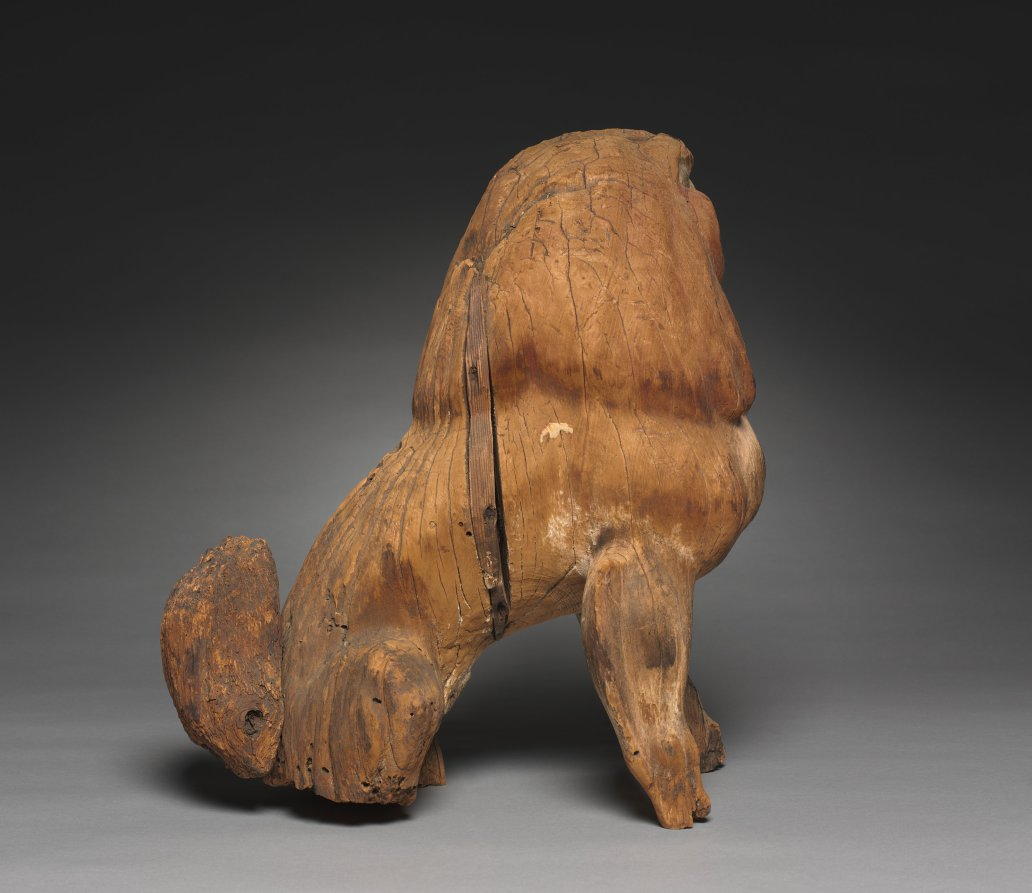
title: Guardian Animal: Karashishi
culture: Japan, Kamakura period (1185–1333)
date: 1300s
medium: Wood with traces of color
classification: Sculpture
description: Placed at the entrance to shrines and temples in Japan, guardian figures ward off evil spirits. These guardians used to be painted red and white and are distinguishable by their facial expressions: the open-mouthed animal is a karashishi, or “Chinese lion,” while the close-mouthed beast, which once had a single horn protruding from its head, is called a komainu, or “Korean dog.” The mouths correspond to infinity, the syllables ah (open) and um (closed), or the alpha and omega. This pairing was widespread in ancient times in Chinese territories and likely found its way to Japan via kingdoms in Korea.